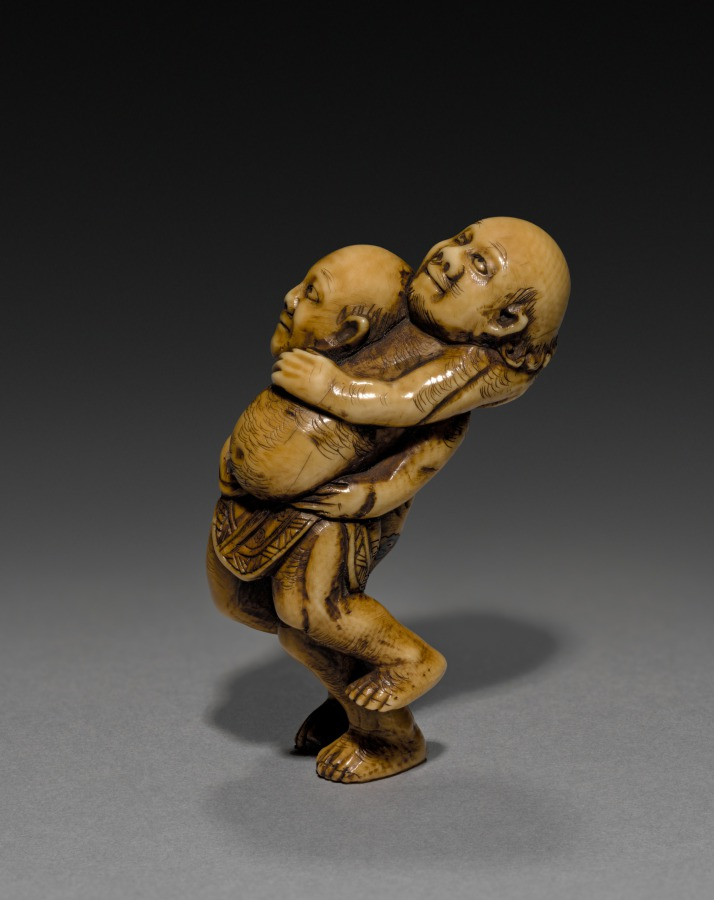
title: Man Carrying Another Man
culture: Japan, Meiji period (1868–1912)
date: early 1900s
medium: ivory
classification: Netsuke